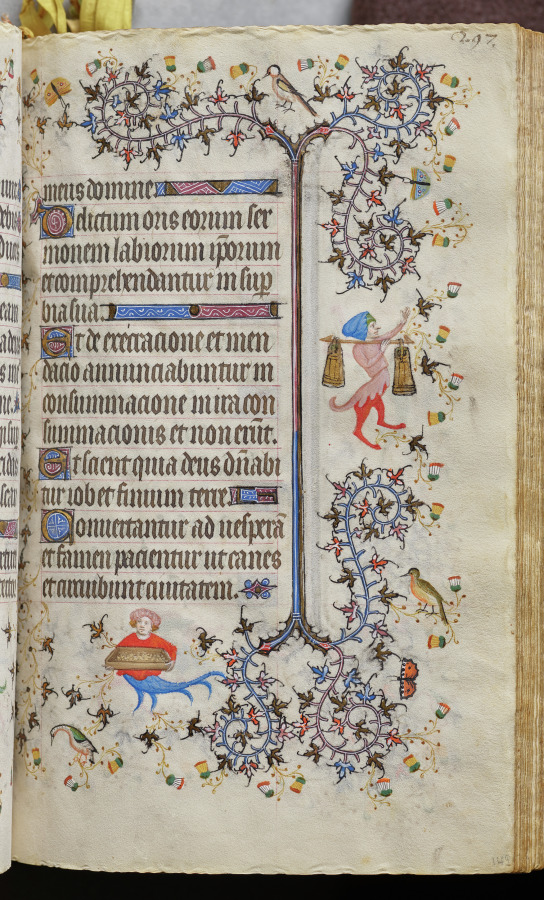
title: Hours of Charles the Noble, King of Navarre (1361-1425): fol. 149r, Text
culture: France, Paris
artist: Master of the Brussels Initials and Associates (French)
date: c. 1405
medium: ink, tempera, and gold on vellum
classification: Bound Volume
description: This precious volume was obviously highly prized by its owner, the French-born King of Navarre, who had his coat of arms painted on no less than twenty folios. Rather than directly commissioning this manuscript from a specific workshop, it seems that Charles the Noble acquired his book of hours -- perhaps ready-made for the luxury market -- while on a trip to Paris in 1404-05. A collaborative effort, six painting styles are evidenced within the pages of this codex, those of two Italians, two Frenchmen, and two Netherlanders. The painter who was responsible for the planning and decoration of the book, and who produced seventeen of the large miniatures, was a Bolognese artist known as the Master of the Brussels Initials. His principal assistant, responsible for most of the borders, was a Florentine who signed his name "Zecho" da Firenze on folio 208 verso.